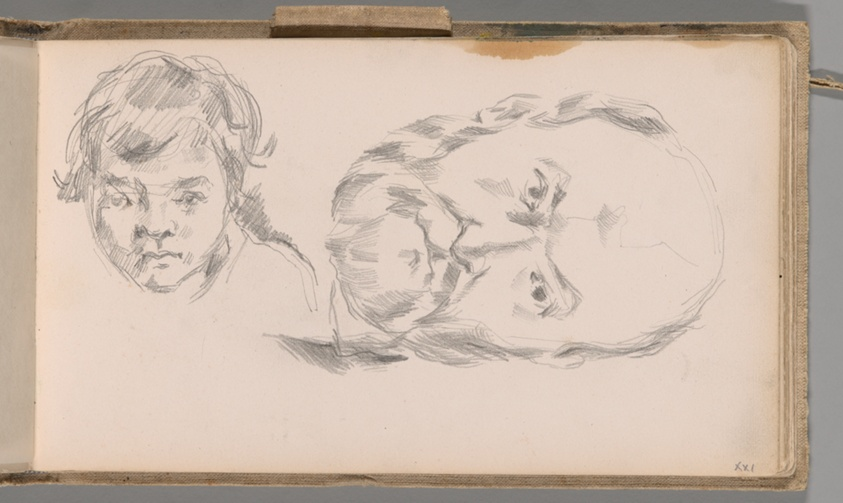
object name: Drawing and Watercolor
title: Sketchbook No. 2 (L'Estaque)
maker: Paul Cézanne; French, 1839-1906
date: 1875–86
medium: Graphite and pen and ink drawings on paper, bound into a book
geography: France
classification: sketchbook; graphite; prints and drawing; paper